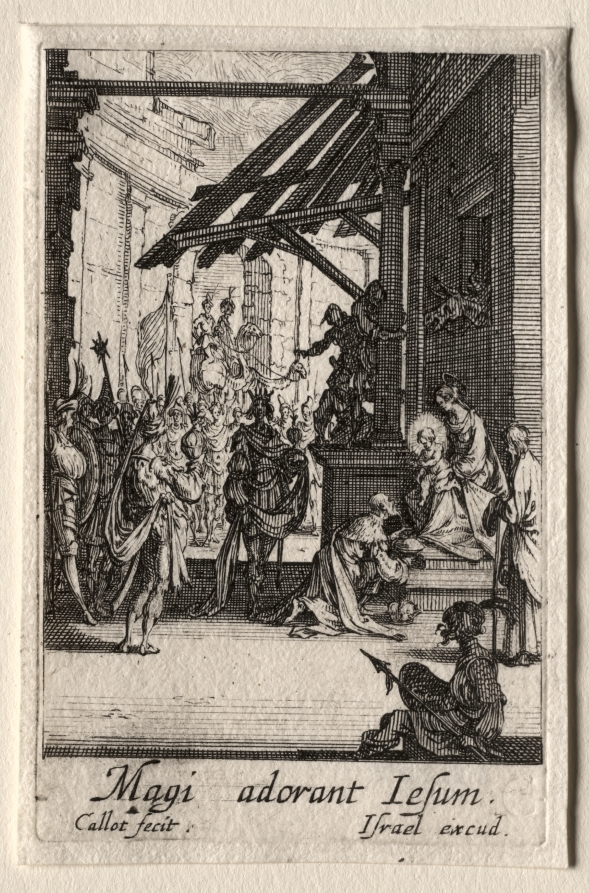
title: The Life of the Virgin: The Adoration of the Magi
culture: France, 17th century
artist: Jacques Callot (French, 1592–1635)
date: ca. 1633–34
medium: etching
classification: Print